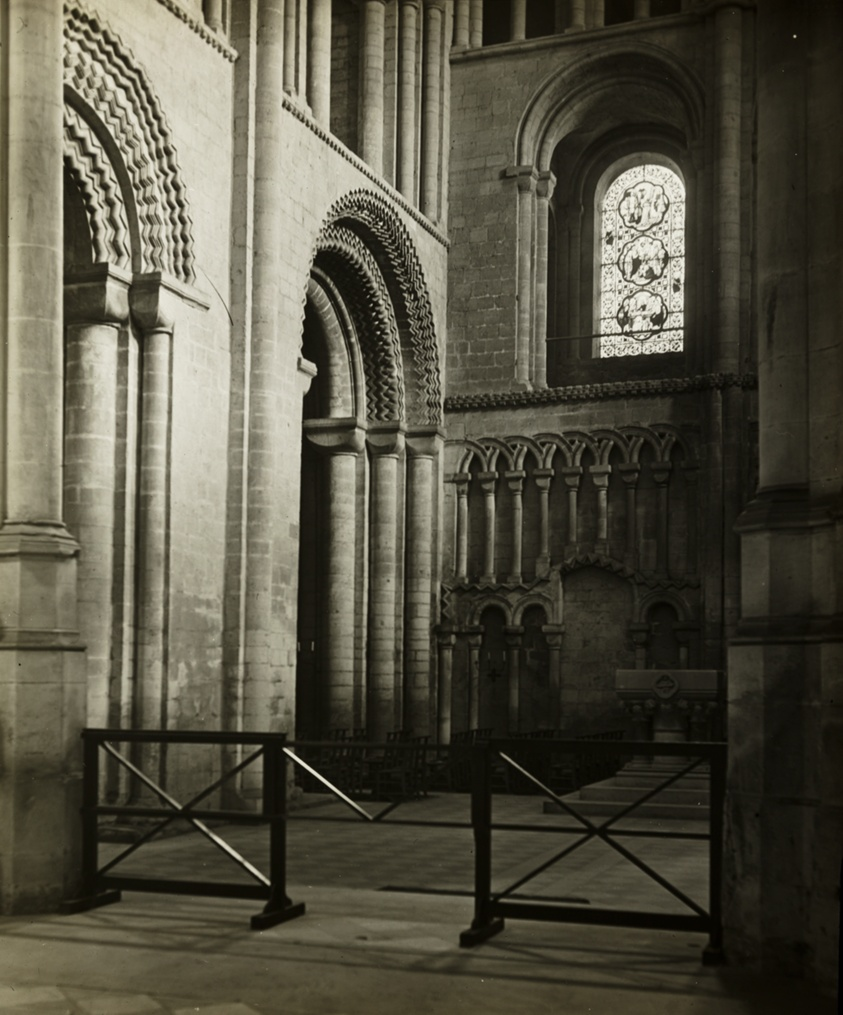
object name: Photograph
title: Ely Cathedral: Southwest Transept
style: Pictorialism, 19th century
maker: Frederick H. Evans (English, 1853–1943)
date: 1891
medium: Lantern slide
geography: England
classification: photograph; photography